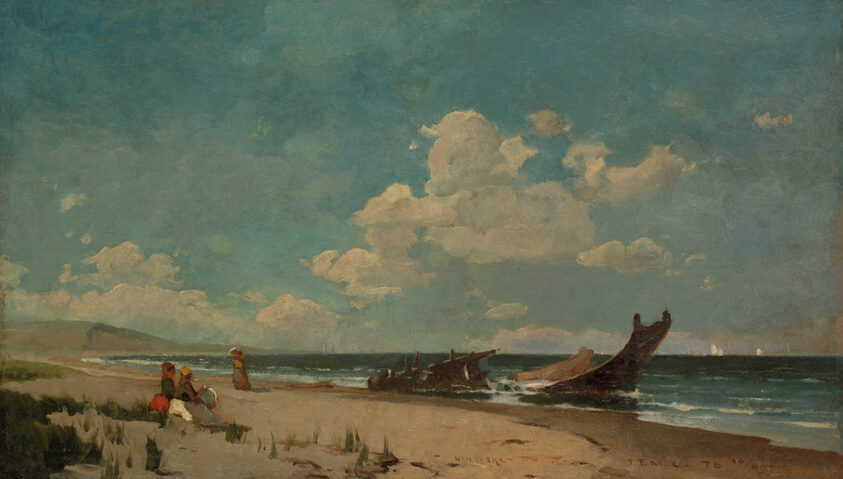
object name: Painting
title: Nantasket Beach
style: Impressionism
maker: Emil Carlsen (American, born Denmark, 1853–1932)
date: 1876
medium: Oil on canvas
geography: United States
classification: painting; american arts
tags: landscapes, Chicago